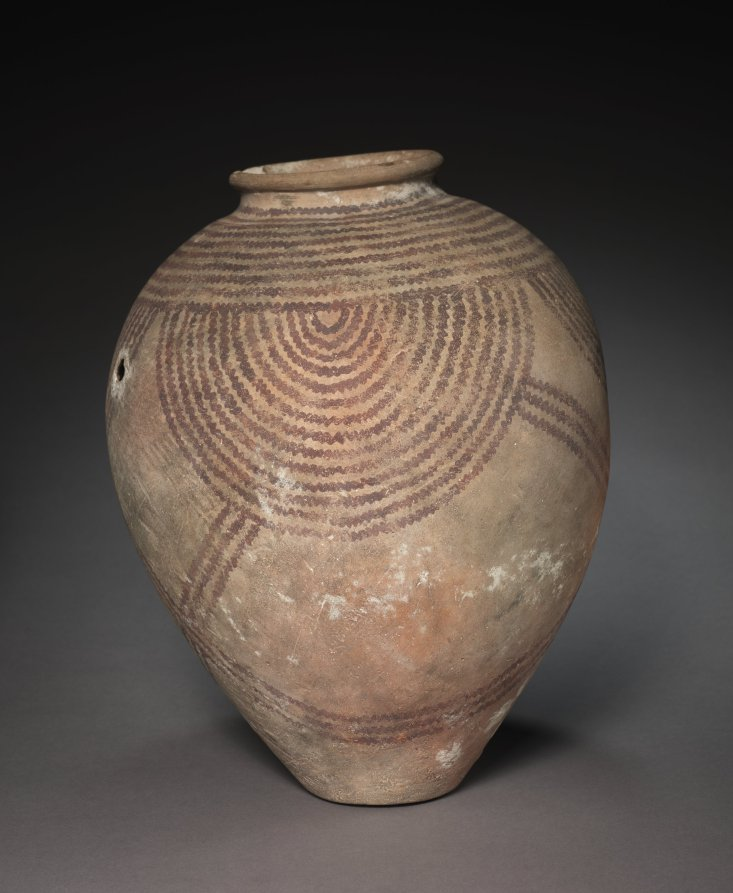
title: Decorated Jar with Rope Pattern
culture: Egypt, Predynastic (5000–2950 BCE), Naqada IId (3650–3300 BCE)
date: 4000–3000 BCE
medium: marl clay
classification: Vessels